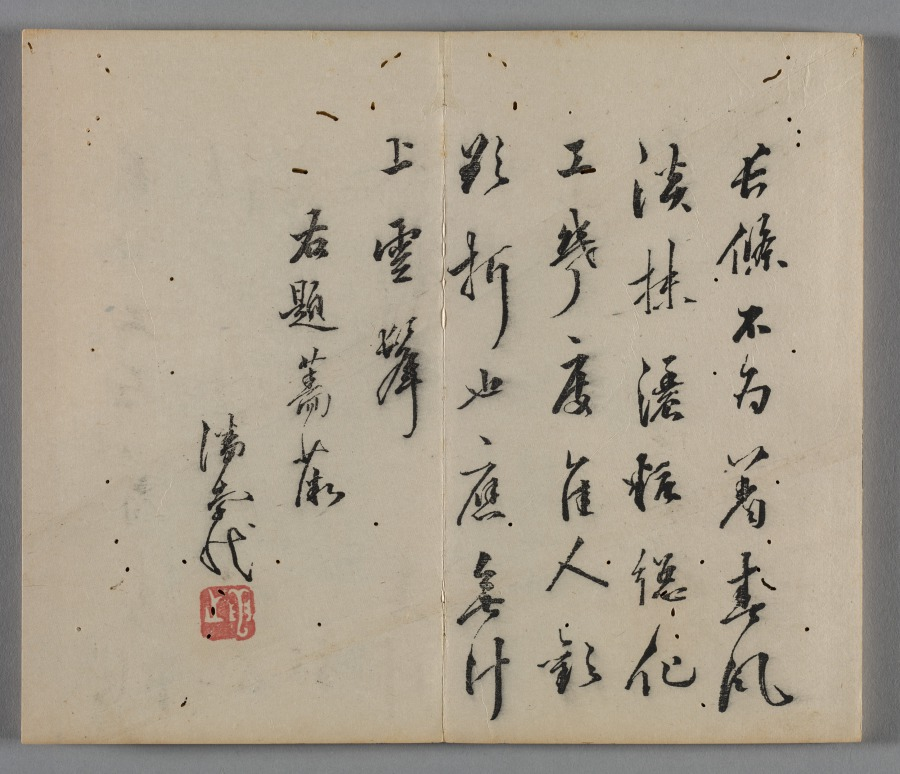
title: Ten Bamboo Studio Painting and Calligraphy Handbook (Shizhuzhai shuhua pu): Birds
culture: China, Qing dynasty (1644-1911)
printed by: Hu Zhengyan (Chinese, c. 1584–1674)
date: 1633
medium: Woodblock-printed book; ink and colors on paper; first edition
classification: Print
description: Color printing reached a level of perfection in the early 1600s, as seen in this Ten Bamboo Studio Collection of Calligraphy and Painting and the Mustard Seed Garden Manual of Painting (printed 1679 and 1701). The painterly quality, precision in registering (aligning) the woodblocks, and harmonious colors made them the most successful color print editions in Chinese history. Both editions were printed and compiled in Nanjing, spread nationwide, and had a great impact on the arts in Japan and Korea.